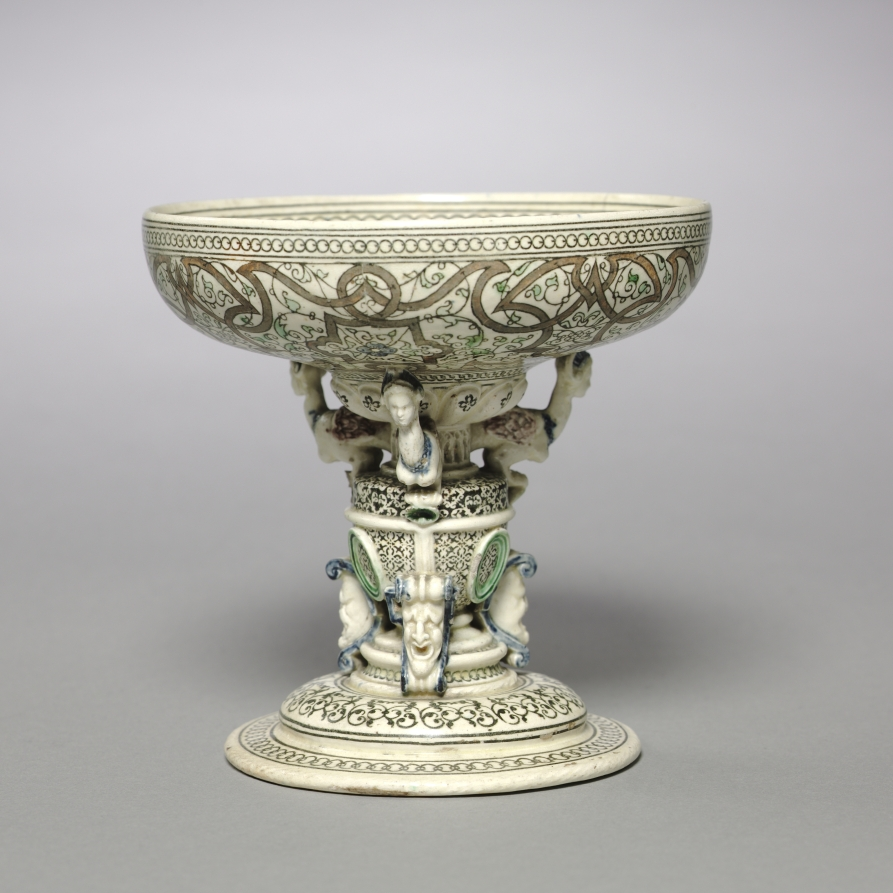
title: Standing Cup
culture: France, 16th century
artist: Saint-Porchaire (French)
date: c. 1540–60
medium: lead-glazed, white-paste earthenware with inlaid slip decoration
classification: Ceramic